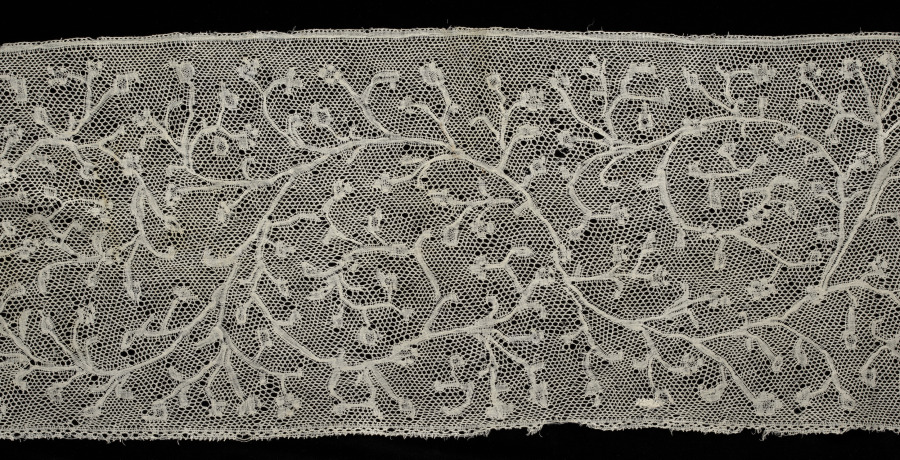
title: Lace Flounce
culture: Italy, Abruzzi, Pescocostanzo ?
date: 1800s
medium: Linen: bobbin lace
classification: Lace